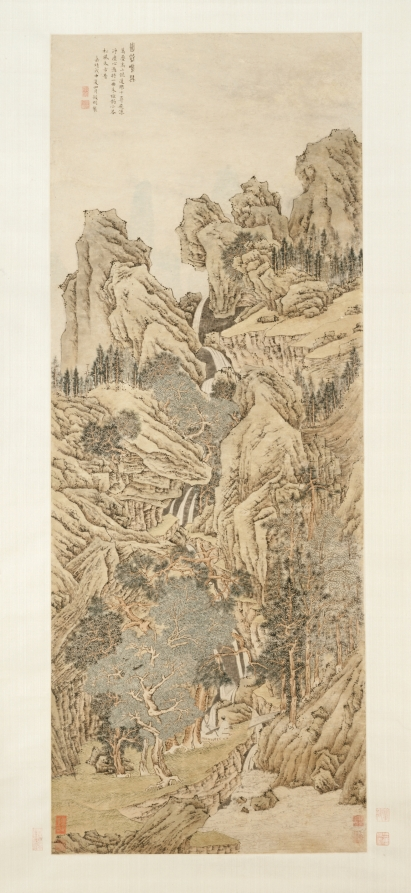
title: Playing the Qin in a Secluded Valley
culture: China, Ming dynasty (1368–1644)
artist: imitator of Wen Zhengming (Chinese, 1470–1559)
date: 1548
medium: hanging scroll; ink and light color on paper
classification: Painting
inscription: 幽壑鳴琴。 萬疊高山供道眼，千尋飛瀑淨塵心。 憑將一曲朱絃琴，小答松風太古音。 嘉慶戊申夏四月徵明製 [印] 徵明; 徵仲父印 [右下方] 悟言室印; 衡山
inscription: 4 additional seals: 3 of Cheng Qi 程琦 (1911–1988); 1 unidentified.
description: The poem inscribed in this painting reads: "Ten thousand layered lofty mountains are presented to the cultivated eye, A thousand feet of cascading falls cleanse the dusty heart. May the harmonies of my red-stringed tune Be the humble answer to the pine wind's ancient song." Different versions of this painting exist. Scholars have suggested that the solid renderings of the rock masses and the volumetric mountain configurations as seen here appear more characteristic of Lu Zhi 陸治 (1496–1576), Wen Zhengming's pupil.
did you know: In paintings, Chinese literati often play the instrument in a landscape setting, as the sound of the qin symbolizes harmony between man and nature.